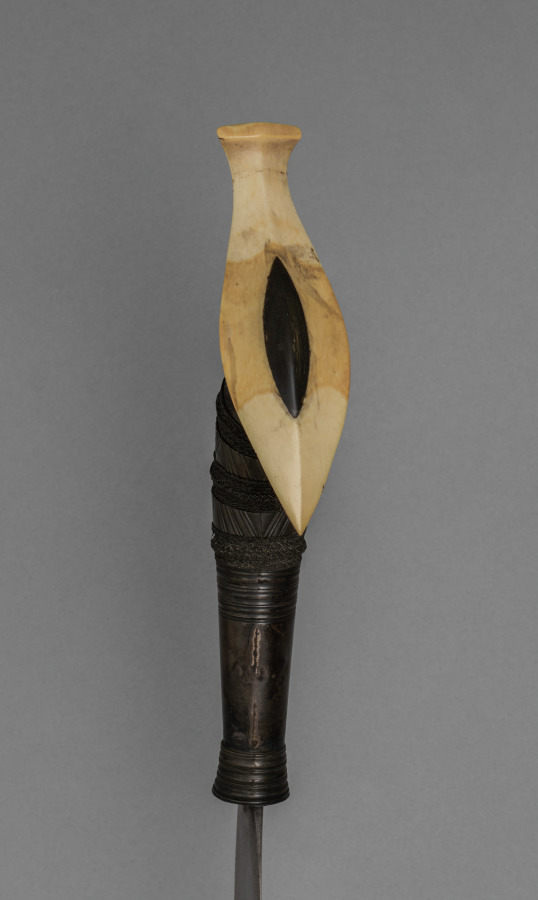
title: Sword (Barong)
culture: Philippines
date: c. 1800s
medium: Blade: steel; handle: silver with braided wire; pommel: ivory with carabao horn inlay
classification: Arms and Armor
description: This sword has a broad, leaf-shaped blade characteristic of the Sulu Archipelago. Its profile suggests it was used for powerful cut-and-slash fighting. The ivory pommel, inlaid with black hardwood, takes the form of a stylized cockatoo (kakatua). This feature, along with the finely worked horn grip, indicates that this was a prestige weapon owned by a member of the warrior nobility.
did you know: The grip is made of carabao horn, a draft animal similar to the water buffalo.